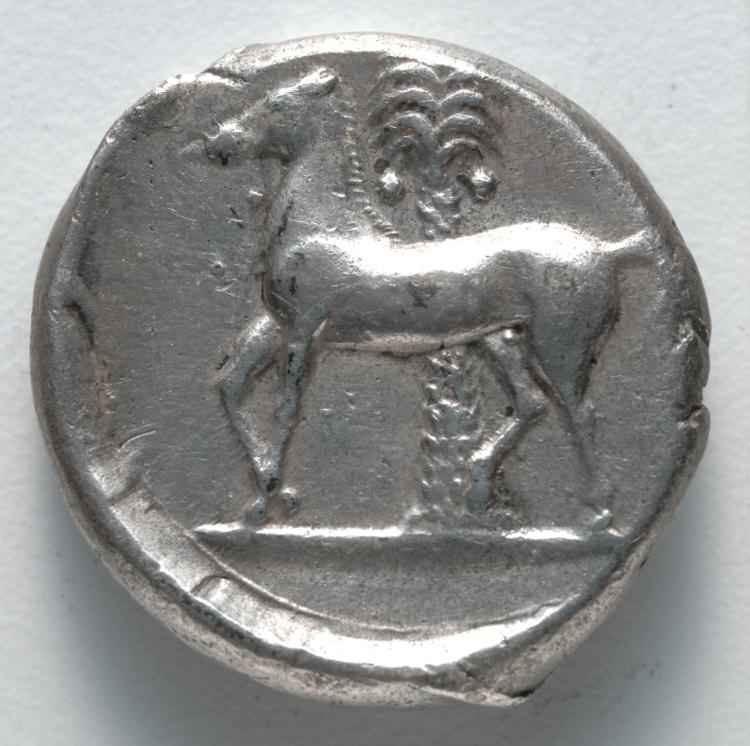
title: Tetradrachm: Horse (reverse)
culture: Greek, Siculo-Punic, probably minted at Lilybaion (Sicily)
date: c. 350–320 BCE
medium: silver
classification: Coins